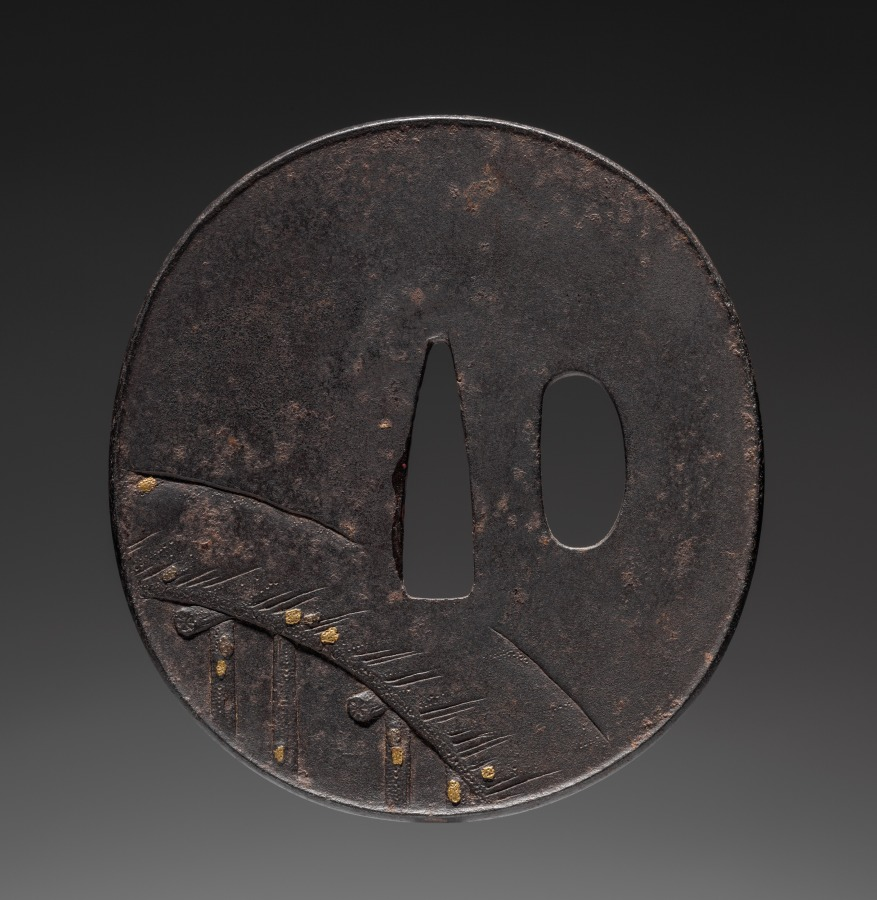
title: Sword Guard (Tsuba) with Carp in Waterfall and Bridge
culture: Japan, Edo period (1615–1868)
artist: Sekijoken Taizan Motozane (Japanese, 1740–1829)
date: c. 1760–1829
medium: iron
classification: Arms and Armor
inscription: Signature: Sekijoken Taizan Motozane